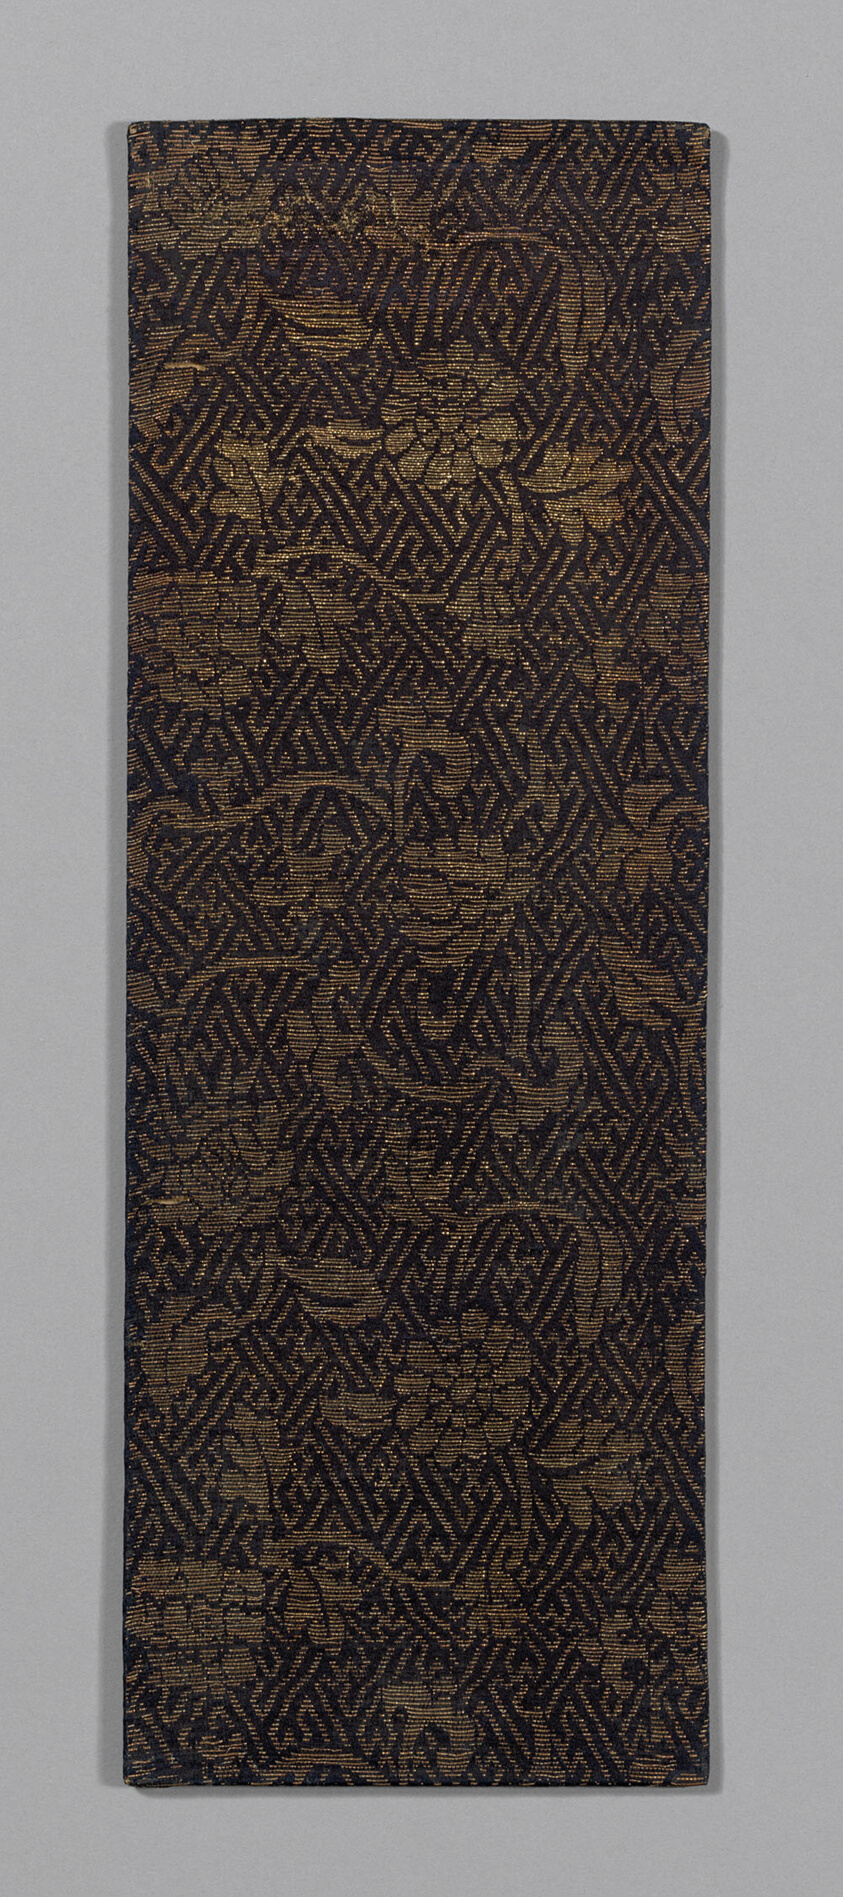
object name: Textile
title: Sutra Cover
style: ming, Chinese (culture or style), East Asian, asian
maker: China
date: Ming dynasty (1368–1644), c. 1590's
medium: Silk and gold-leaf-over-lacquered-paper strip, warp-float faced 4:1 satin weave with supplementary patterning wefts bound in weft-float faced 1:4 satin interlacings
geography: China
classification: textile; weaving